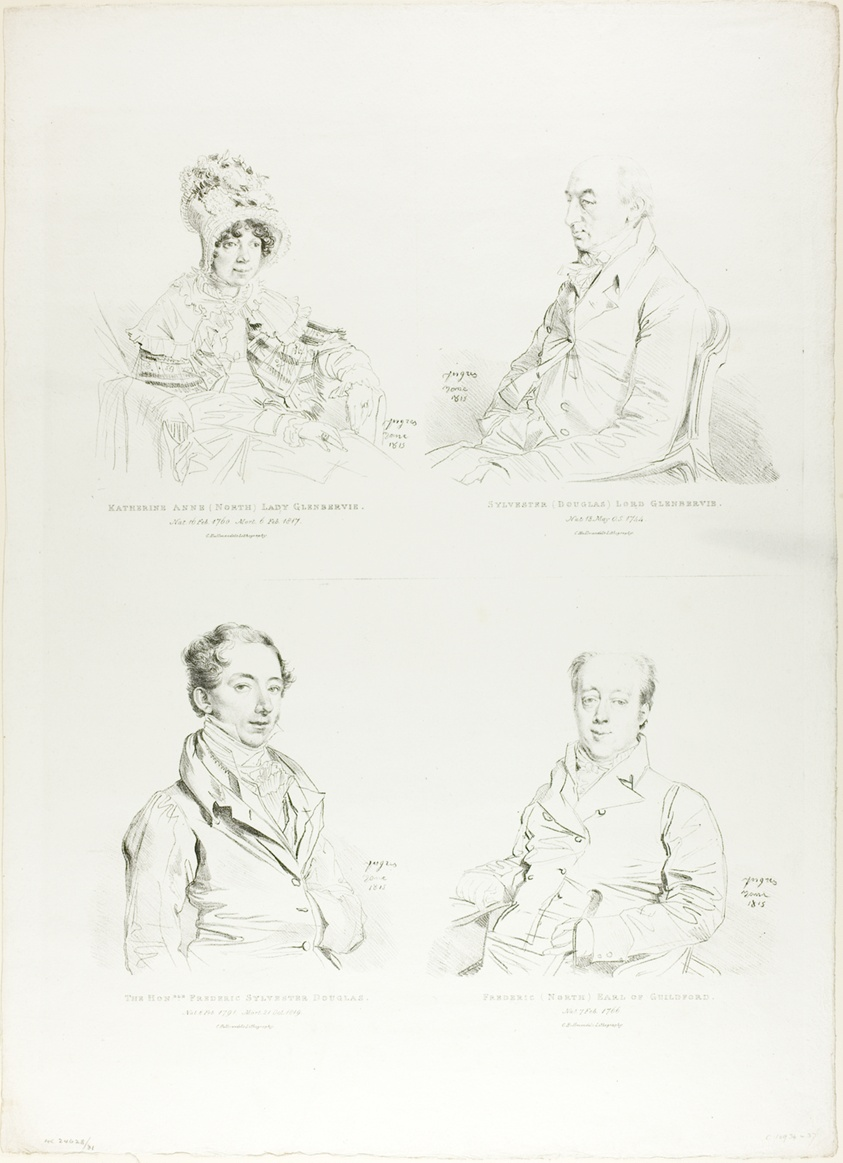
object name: Print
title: Four Family Portraits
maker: Jean–Auguste–Dominique Ingres; French, 1780–1867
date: 1815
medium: Four lithographs in black on one sheet of ivory wove paper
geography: France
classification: lithograph; print; prints and drawing